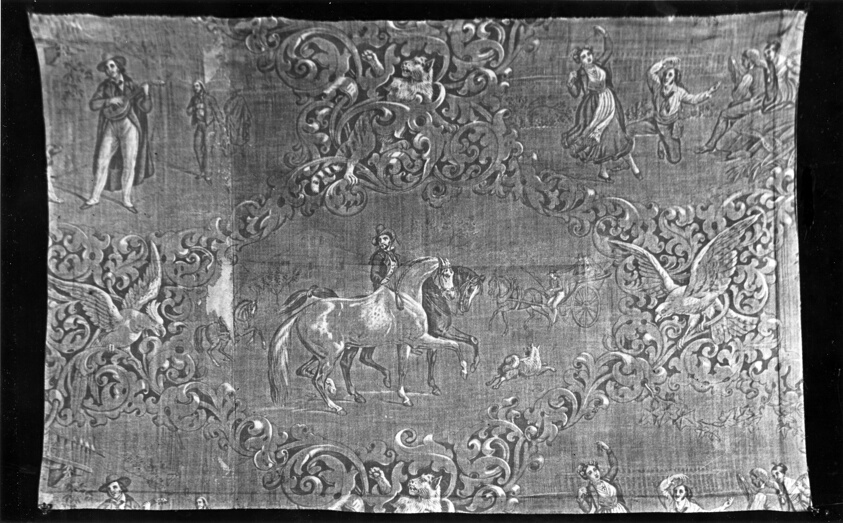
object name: Textile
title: Le Troubadour (Furnishing Fabric)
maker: France, Alsace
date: 1840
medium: Cotton, plain weave; roller printed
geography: France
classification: textile; weaving - printed; furnishing textile